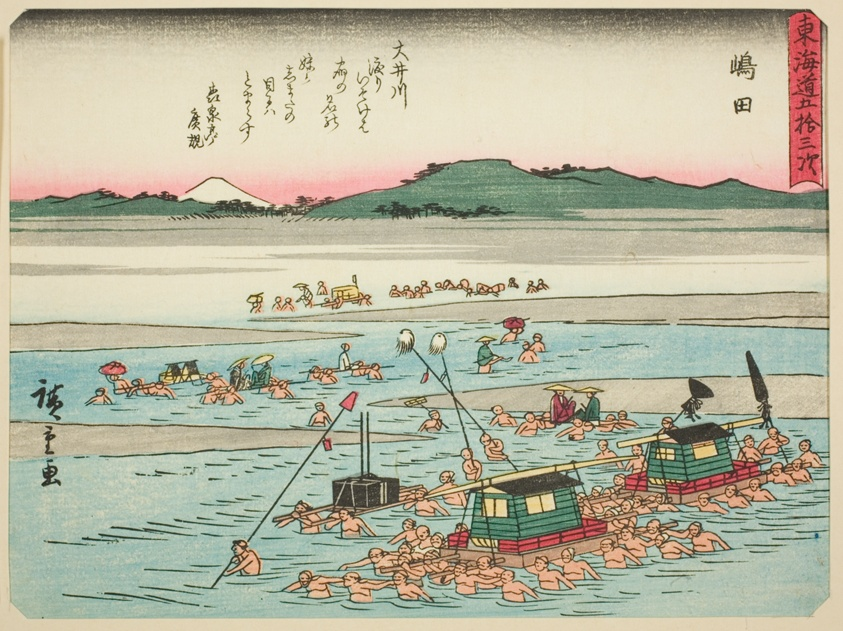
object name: Print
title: Shimada, from the series "Fifty-three Stations of the Tokaido (Tokaido gojusan tsugi)," also known as the Tokaido with Poem (Kyoka iri Tokaido)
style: Japanese (culture or style)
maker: Utagawa Hiroshige 歌川 広重; Japanese, 1797-1858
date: c. 1837/42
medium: Color woodblock print; chuban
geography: Japan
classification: woodblock print; print; asian art